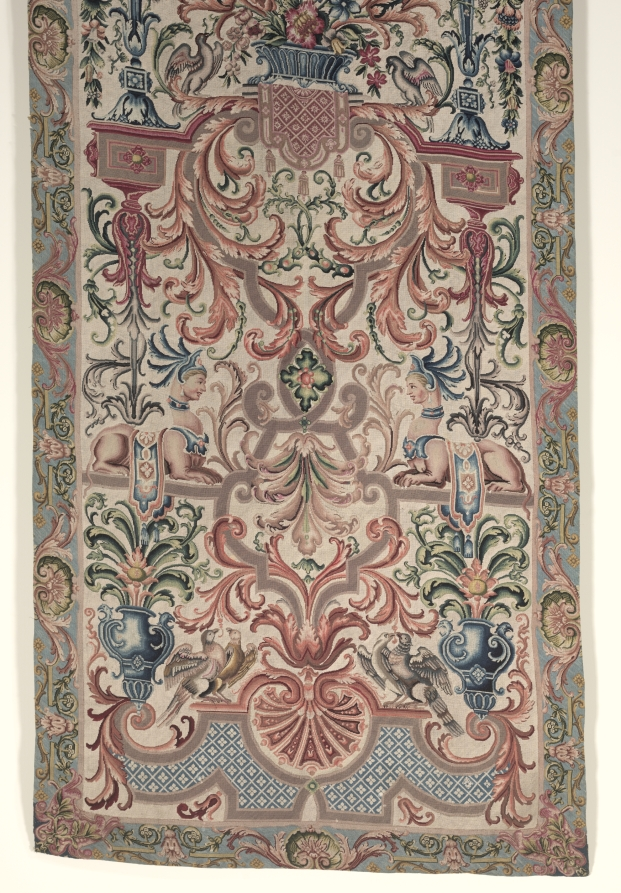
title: Needlework Bed Hanging (2 of 2)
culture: France, late 17th century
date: c. 1690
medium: petit point embroidery; silk and wool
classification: Embroidery